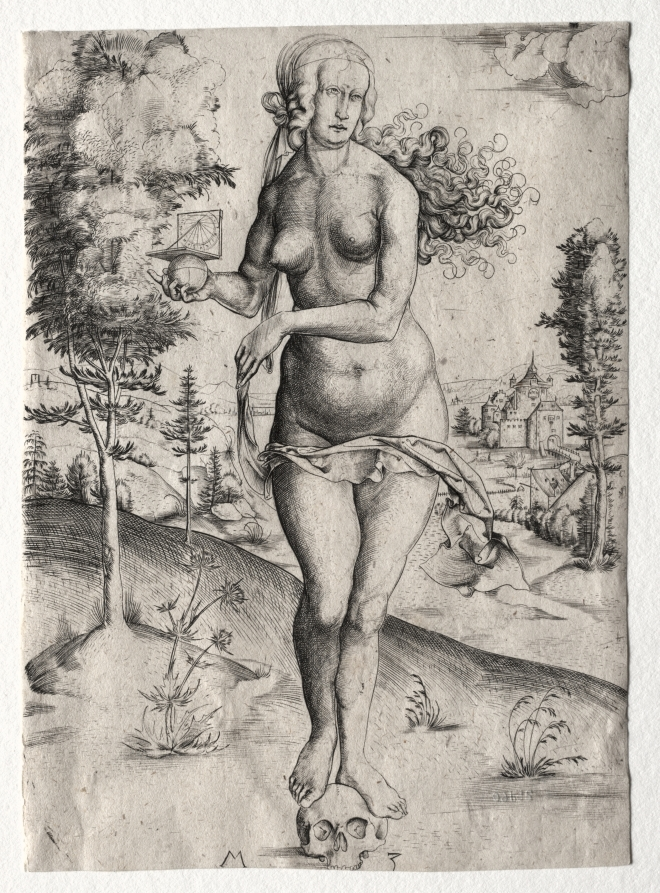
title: Memento Mori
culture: Germany, early 16th Century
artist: Master MZ (German)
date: 1500–03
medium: engraving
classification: Print